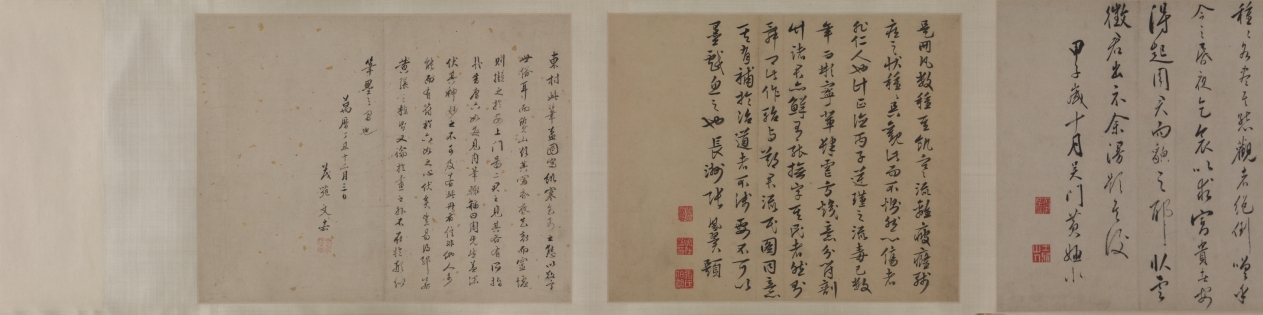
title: Beggars and Street Characters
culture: China, Ming dynasty (1368–1644)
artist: Zhou Chen (Chinese, c. 1450–c. 1536)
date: 1516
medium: Handscroll; ink and light color on paper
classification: Painting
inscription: 題: 周臣流氓圖. 古堇趙鶴琴 [印] 老鶴臨池; 鵝池軒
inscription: 正德丙子秋七月，閒窗無事 ，偶記素見市道丐者種種態度。乘筆硯之便，率爾圖寫。雖無足觀，亦可以助警勵世俗云。 東邨周臣記 [印]東邨; 舜卿; 鵝場散人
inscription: 吳中東邨周君，善丹青，尤長於人物。此圖其所見盛市丐者之狀種種，各盡其態，觀者絕倒。嗟乎，今之晝夜乞哀以求富貴者，安得起周君而貌之耶。臥雲徵君出示，余漫題其後。 甲子歲十月吳門黃姬水 [印] 士雅山人; 另一印不詳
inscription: 是冊凡數種。其飢寒流離疲癃殘疾之狀，種種之異。觀此而不惻然心傷者，非仁人也。計正德丙子逆瑾之流毒已數年。而[江]彬 [錢] 寧輩肆虐方熾。意分符剖竹諸君，亦鮮有能撫字其民者。然則舜卿此作，殆與鄭君 流民圖同意。其有補於治道者不淺，要不可以墨戲忽之也。 長洲張風翼題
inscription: 東村此筆，蓋圖寫飢寒乞丐之態，以警世俗耳。而質山 [黃姬水]欲其寫昏夜乞哀，而靈墟[張鳳翼]則擬之於安上門圖。二君之見，其各有所指哉。昔唐六如每見周筆，輒稱曰：周先生！蓋深服其神妙之不可及。若此冊者，信非他人可能而有符於六如之心伏矣。豈易得耶。若黃、張之指，則又論於畫之外，不在於形似筆墨之旨也。 萬歷丁丑十二月三日 茂苑文嘉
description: Zhou Chen from Suzhou provides rare depictions of impoverished people that once filled the city’s markets and streets. Despite Suzhou’s prosperity, its rapid growth polarized society, including the wealthy and those who had deserted their farmlands, who were without homes, unemployed, or sick. Amid these are figures who inspire fear rather than empathy. The painting may thus be informed by local practices at the end of the lunar year, in which street beggars, in exchange for food or money, would dress up like ghosts and demons to drive out evil forces.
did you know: Although Zhou Chen's original composition was an album of 24 figures, today it is mounted as two handscrolls, one in the Cleveland collection and one in the Honolulu Museum of Art.